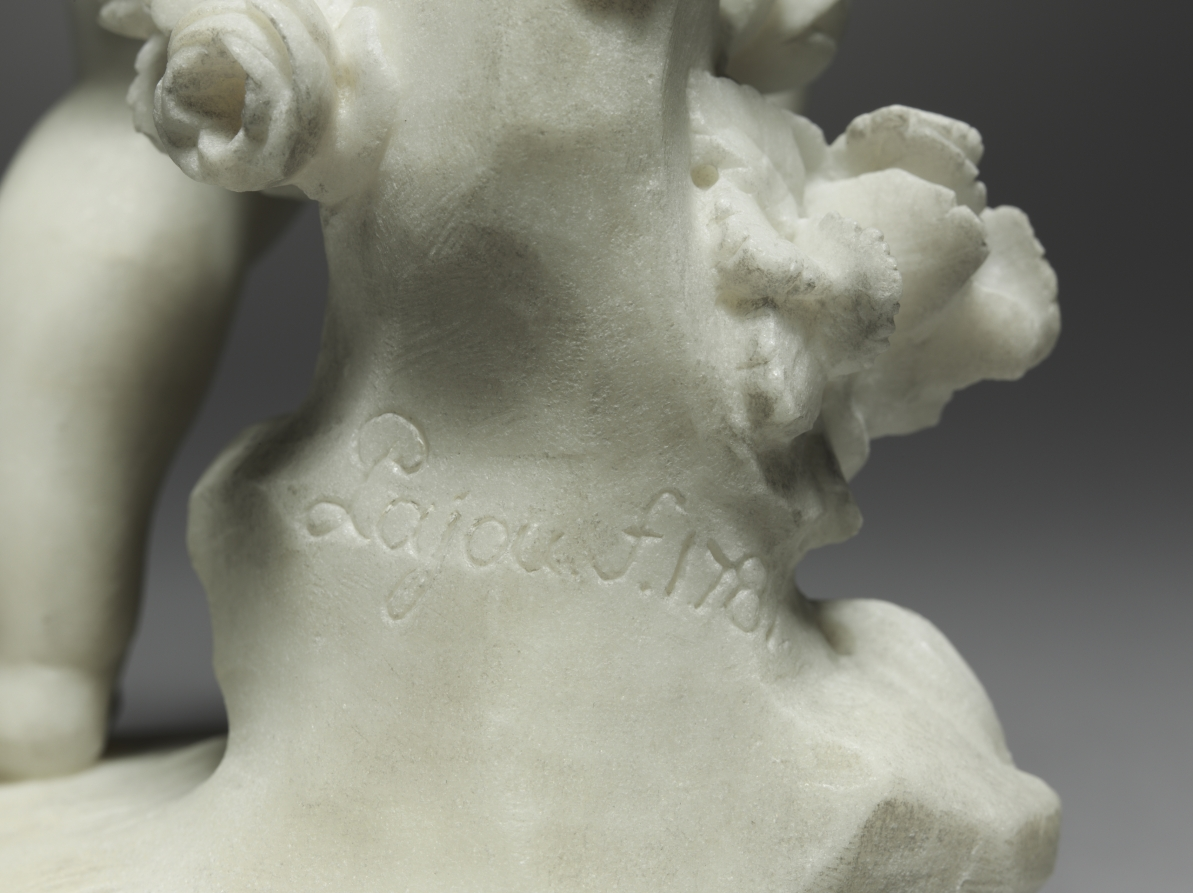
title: Faithful Love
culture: France, 19th century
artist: after Augustin Pajou (French, 1730–1809)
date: 1800s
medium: marble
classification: Sculpture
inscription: signature behind stump with roses: Pajou f(ecit) 1787.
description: These statuettes represent the opposing spectrums of love—fickle and faithful—both portrayed by Cupid. Fickle Love absent-mindedly plays with a butterfly, a symbol of the fleeting moment. Conversely, Faithful Love is accompanied by a dog, the ultimate loyal companion. These works were originally believed to be by the hand of Augustin Pajou, because the works are signed and he made nearly identical sculptures. However, due to the slightly clumsy execution and the awkward scale of the signatures, the museum now believes the statuettes were created by another artist after Pajou's design.